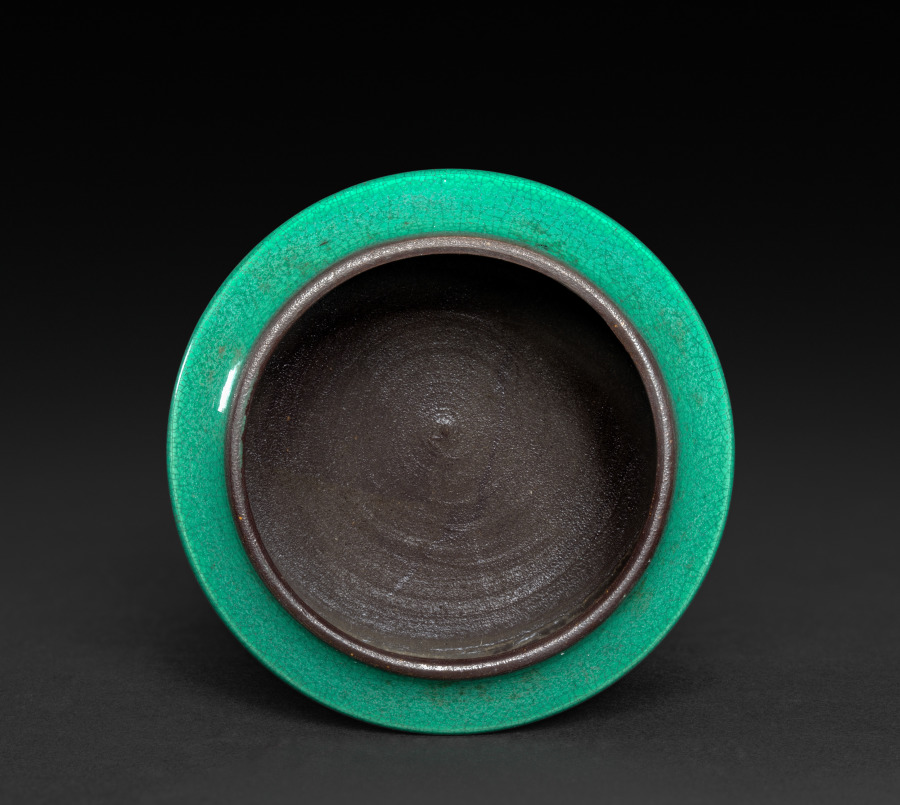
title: Camellia-Leaf-Green Cylindrical Vase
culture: China, Qing dynasty (1644-1911), Kangxi reign (1661-1722)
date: 1661–1722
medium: porcelain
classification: Ceramic